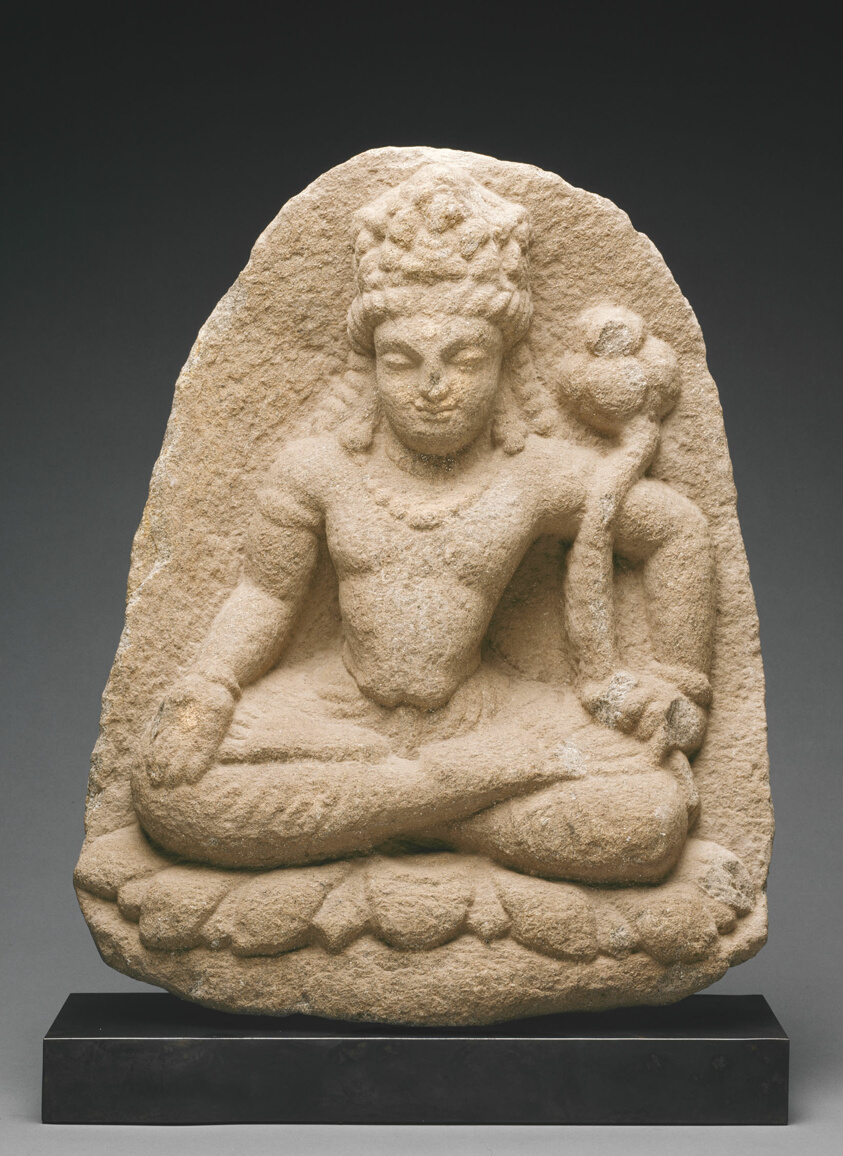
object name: Sculpture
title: Bodhisattva Avalokiteshvara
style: South Asian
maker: Pakistan; Khyber Pakhtunkhwa Province, Swat Valley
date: 8th/9th century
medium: Mica schist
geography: Pakistan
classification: sculpture; stone (unidentified); stone; asian art